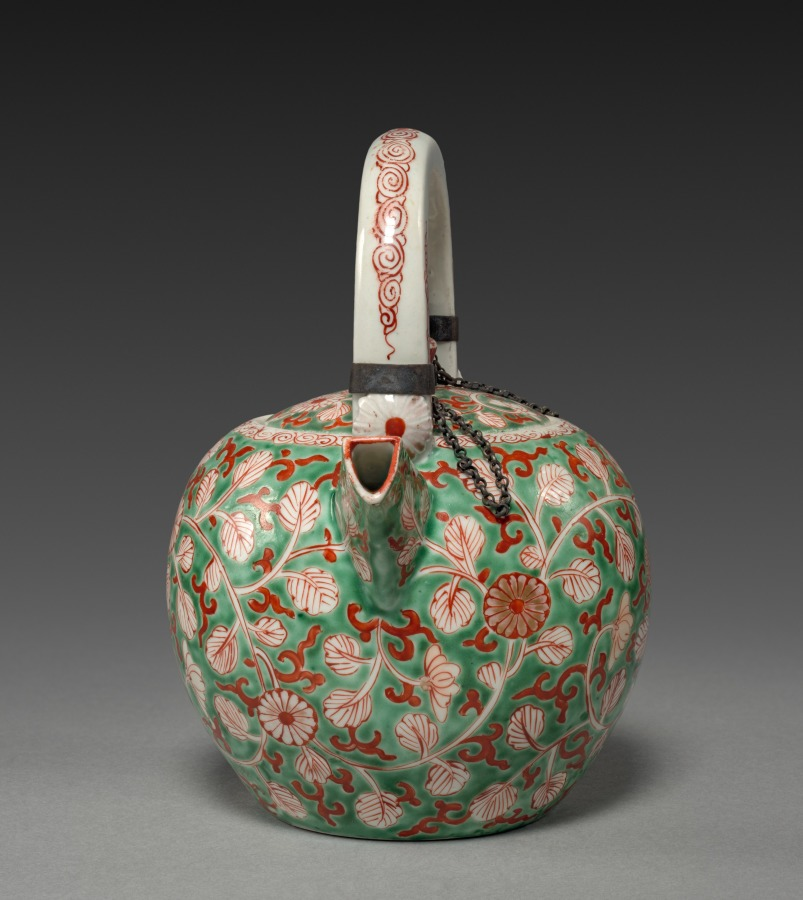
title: Wine Pot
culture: Japan, Edo period (1615–1868)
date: 1615–1868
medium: porcelain with colored enamel decoration (Hizen ware, Arita type)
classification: Ceramic